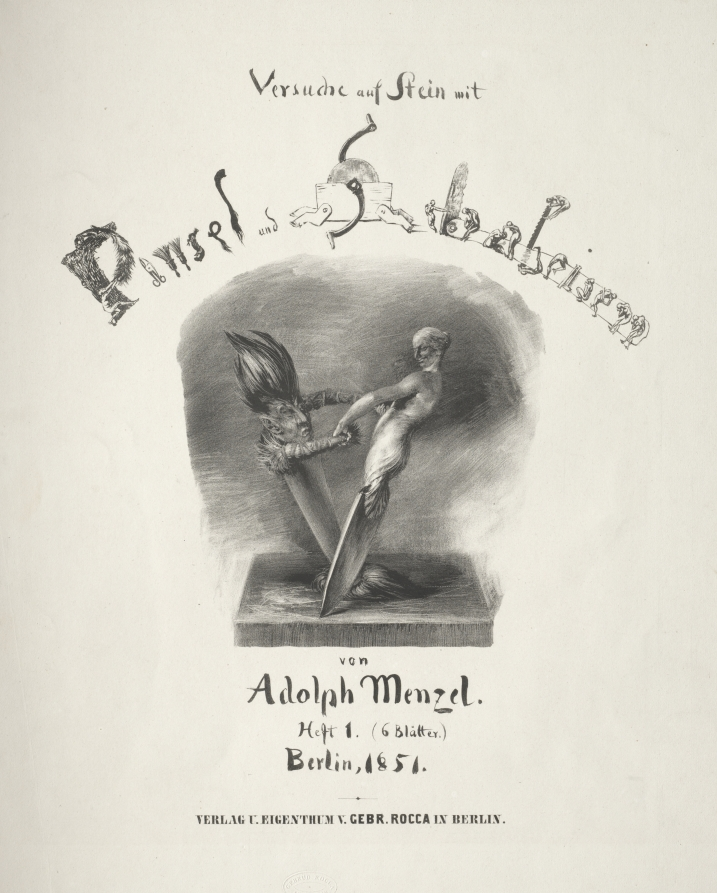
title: Essay on Stone with Brush and Scraper: Title Page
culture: Germany, 19th century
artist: Adolph von Menzel (German, 1815–1905)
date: 1851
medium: lithograph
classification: Print